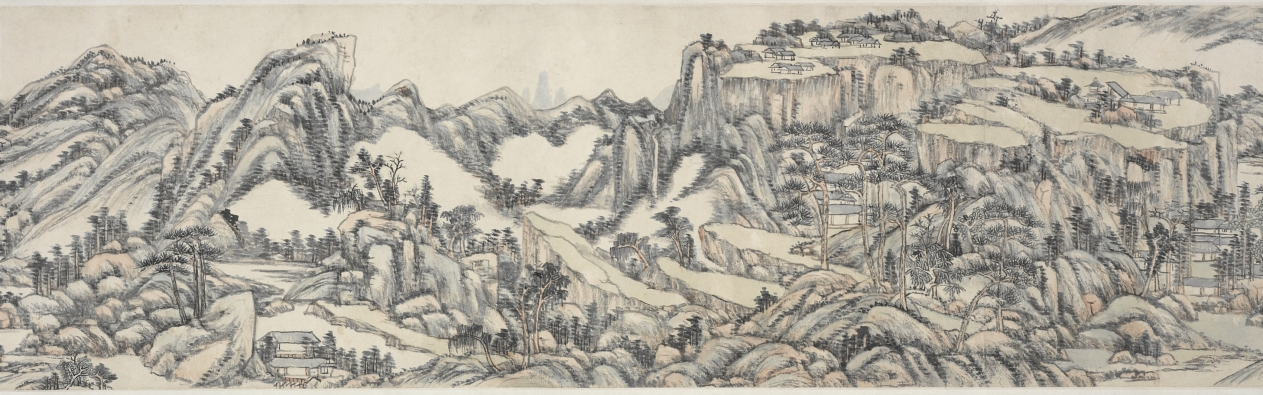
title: Green Peaks under Clear Sky: After Huang Gongwang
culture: China, Qing dynasty (1644-1911)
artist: Wang Yuanqi (Chinese, 1642–1715)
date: 1703–8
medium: handscroll; ink and light color on paper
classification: Painting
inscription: 晴巒霽翠：倣黃子久。麓臺。[印]石師道人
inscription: [印] 御書畫圖留與人看. 子久畫於宋諸大家荊、關、李、范、董、巨，無所不有。運筆不假修飾。皴法由淡入濃，化諸家之迹者也。澹明徐君偶見縮本，臨摹六幅。囑余參以富春大意，成一長卷。余夙夜在公，乘暇偶一點染。至戊子九秋告竣，閱四、五年矣。昔大癡為無用師作富春卷，七年而成，為千古鉅觀。今拙筆癡鈍。亦淹留至此。可為識者噴飯矣。王原祁題。[印]王原祁印; 麓臺 [印, 畫芯左下] 西廬後人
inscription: 3 additional colophons and 15 additional seals: 1 colophon and 9 seals of Yang Shicong 楊士驄 (b. 1870); 1 colophon of Wu Hufan 吳湖帆 (1894–1968); 1 colophon and 1 seal of Wu Mei (20th c.); 5 seals of Cheng Qi 程琦 (1911–1988).